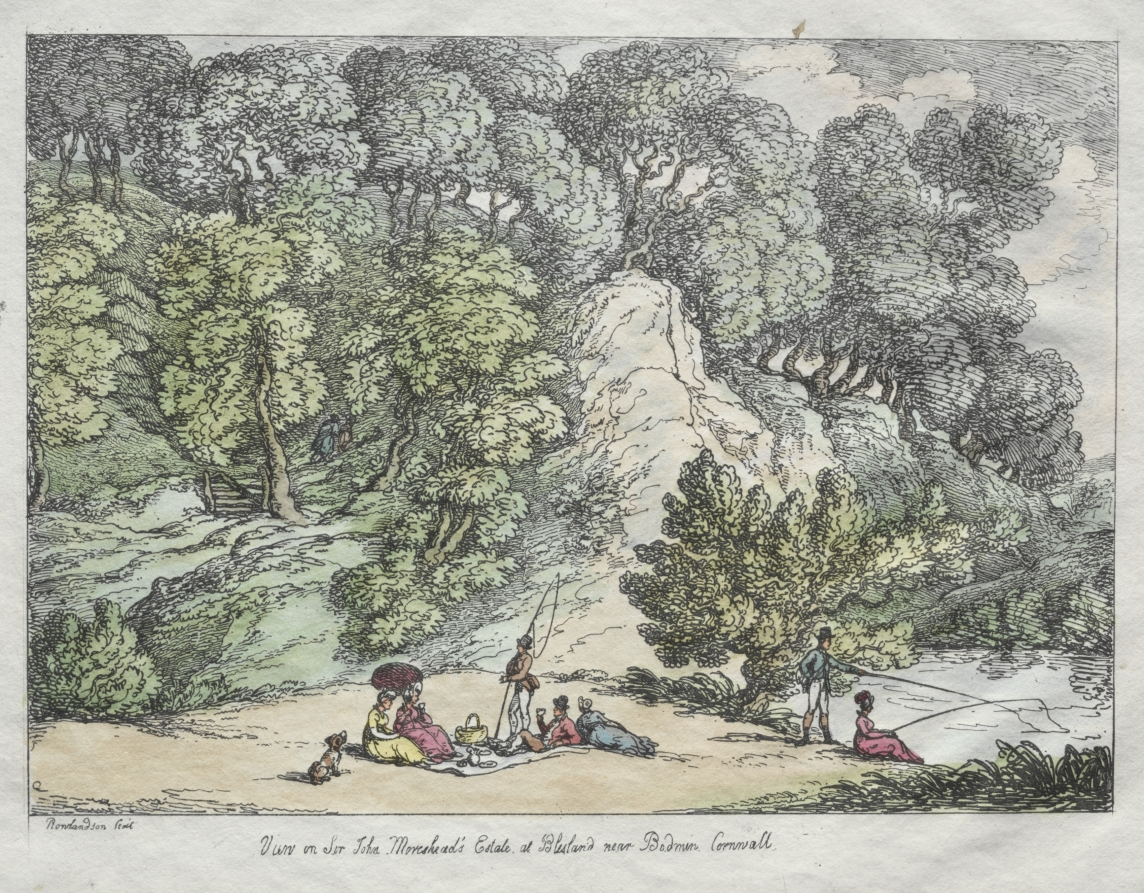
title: View on Sir John Moreshead's Estate at Blisland near Bodmin, Cornwall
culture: England, early 19th Century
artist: Thomas Rowlandson (British, 1756–1827)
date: 1805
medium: etching, hand colored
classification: Print